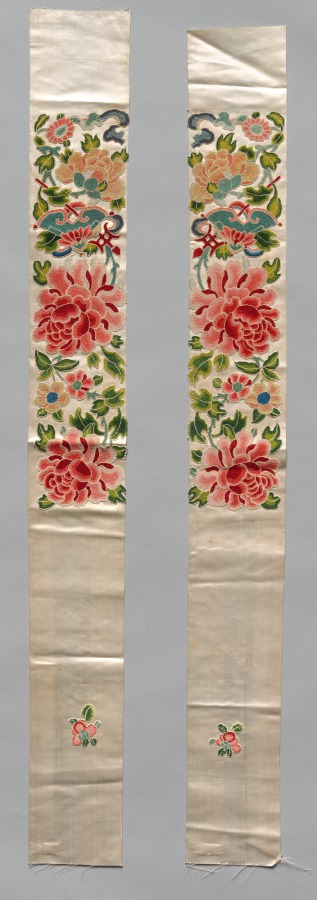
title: Sleeve Bands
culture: China, Qing dynasty (1644-1911) or Republican period (1912-49)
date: 1880–1940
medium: embroidery, silk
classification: Garment